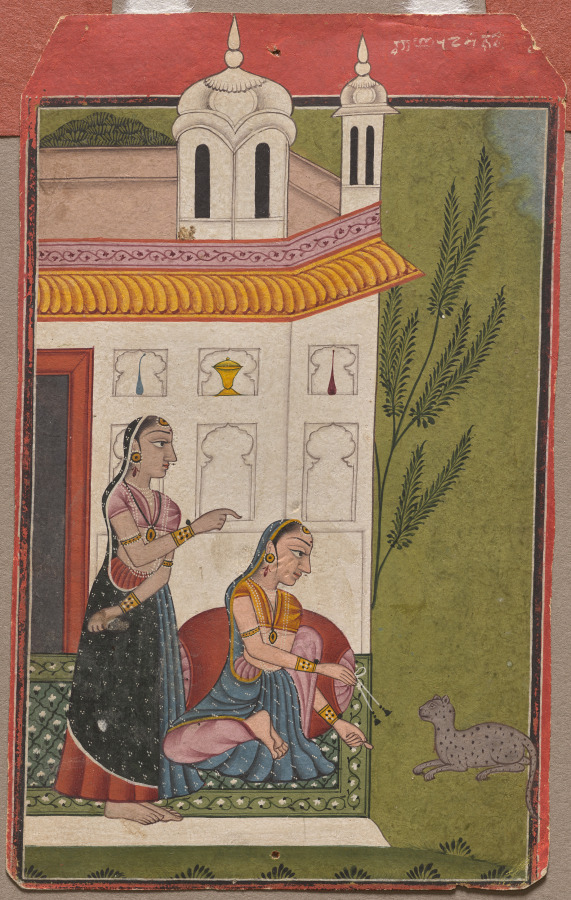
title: Patamanjari Ragini of Dipak, from a Ragamala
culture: Northern India, Pahari kingdoms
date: c. 1740–50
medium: Gum tempera and ink on paper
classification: Painting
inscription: rāgaṇī paṭamaṃjarī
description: The sound that serves as the basis for this musical mode is the voice of the cat. Paintings of Patamanjari Ragini are set on the outdoor terrace of a fine house, complete with niches holding vessels. The heroine sits in front of a bolster on a green floral carpet that the artist has tilted up so as not to obscure its pattern. The spotted gray cat appears shy, and the heroine is trying to entice it with a morsel, while she gestures for it to come.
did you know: A young girl and her companion play with a cat to pass the time.